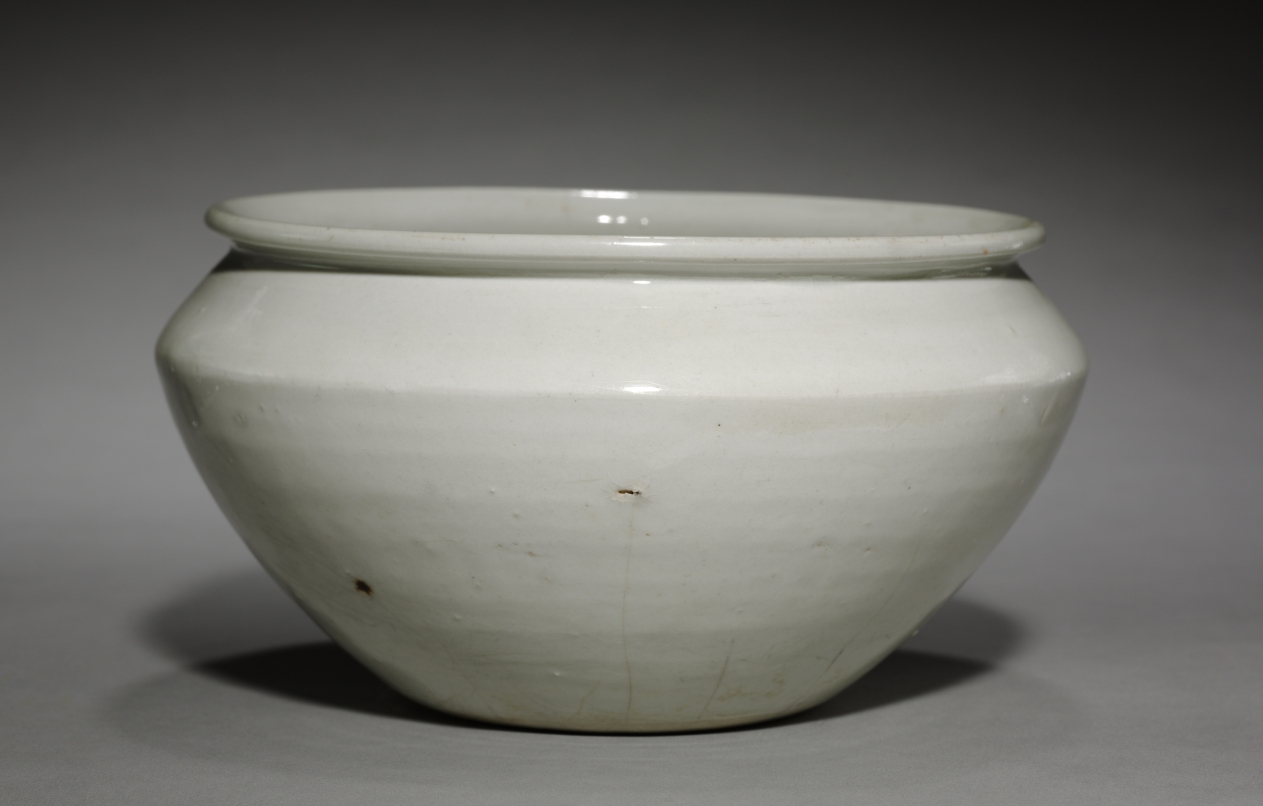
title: Bowl: Southern White Ware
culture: China, Tang dynasty (618-907) - Five dynasties (907-960)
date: late 800s-early 900s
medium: Glazed porcelain, Southern white ware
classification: Ceramic